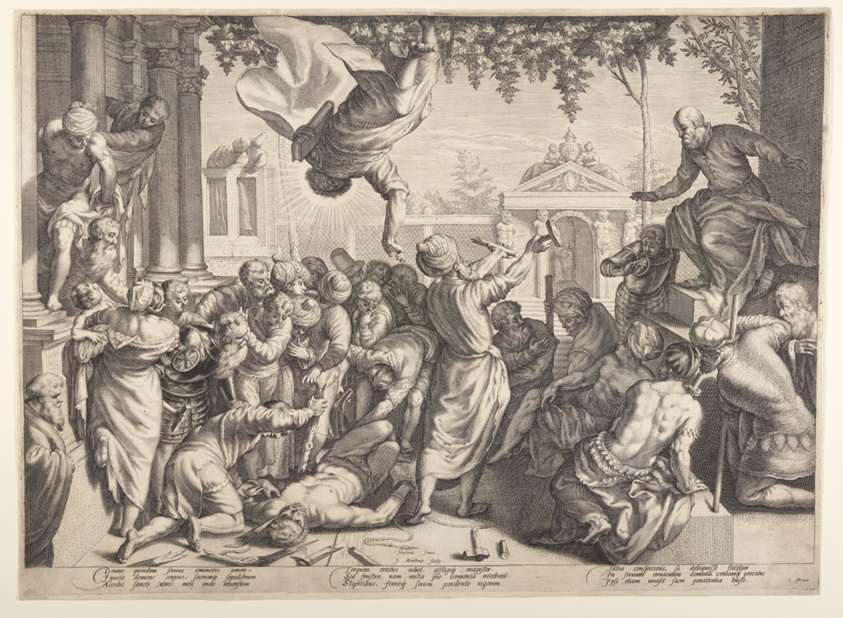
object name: Print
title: The Miracle of the Slave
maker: Jacob Matham (Dutch, 1571–1631); after Tintoretto (Italian, 1518–1594)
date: c. 1597-1600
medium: Engraving on ivory laid paper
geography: Netherlands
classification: engraving; paper; print; prints and drawing